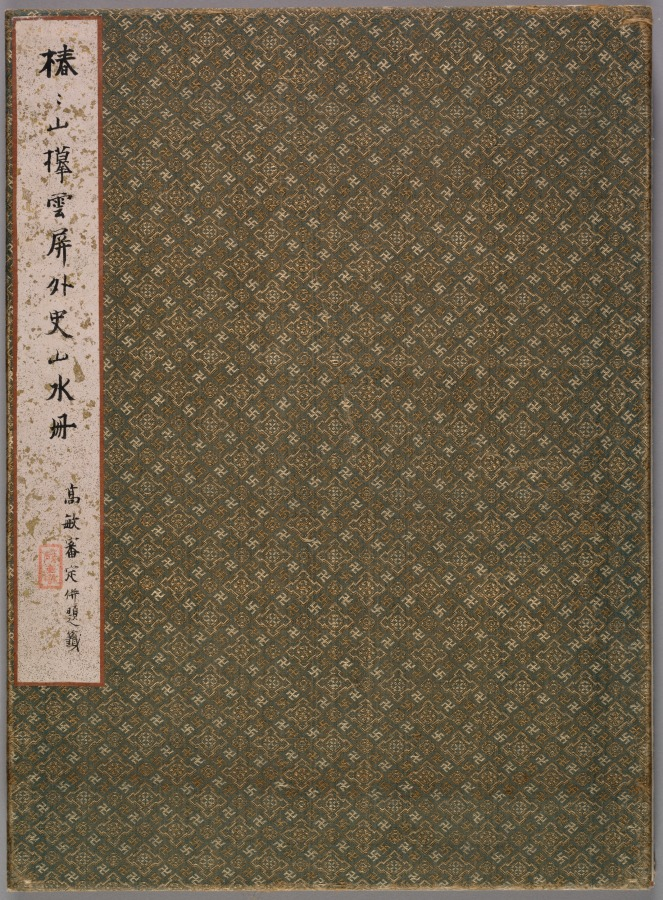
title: Copy of Zhai Dakun's Landscapes in the Styles of Old Masters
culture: Japan, Edo period (1615–1868)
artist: Tsubaki Chinzan (Japanese, 1801–1854)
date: 1847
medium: album of 10 leaves; ink and color on silk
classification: Portfolio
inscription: Tsubaki Chinzan inscribed each leaf with the same inscription that Zhai Dakun wrote on his album leaves.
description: As the title of this album suggests, Tsubaki Chinzan painted each of the landscapes included in the album after interpretations of the styles of old masters by Chinese painter Zhai Dakun (翟大坤, active 1730–1804). In addition to the painted compositions, he also copied the inscriptions on Zhai Dakun's paintings.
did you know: The album that inspired Tsubaki Chinzan is also in the collection of the Cleveland Museum of Art, 1986.49.